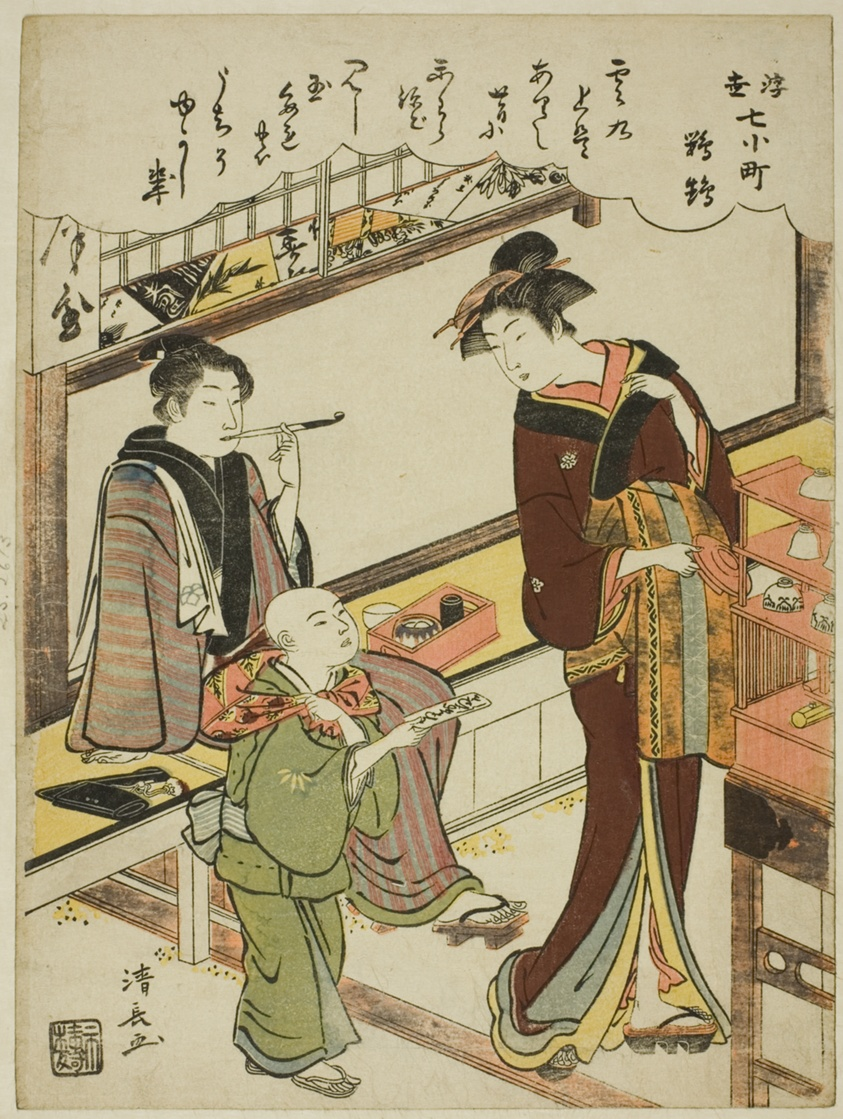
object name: Print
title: Parrot (Omu), from the series "Floating World Versions of the Seven Komachi (Ukiyo Nana Komachi)"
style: Japanese (culture or style)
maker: Torii Kiyonaga (Japanese, 1752-1815)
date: c. 1780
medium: Color woodblock print; chuban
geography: Japan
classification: woodblock print; print; asian art